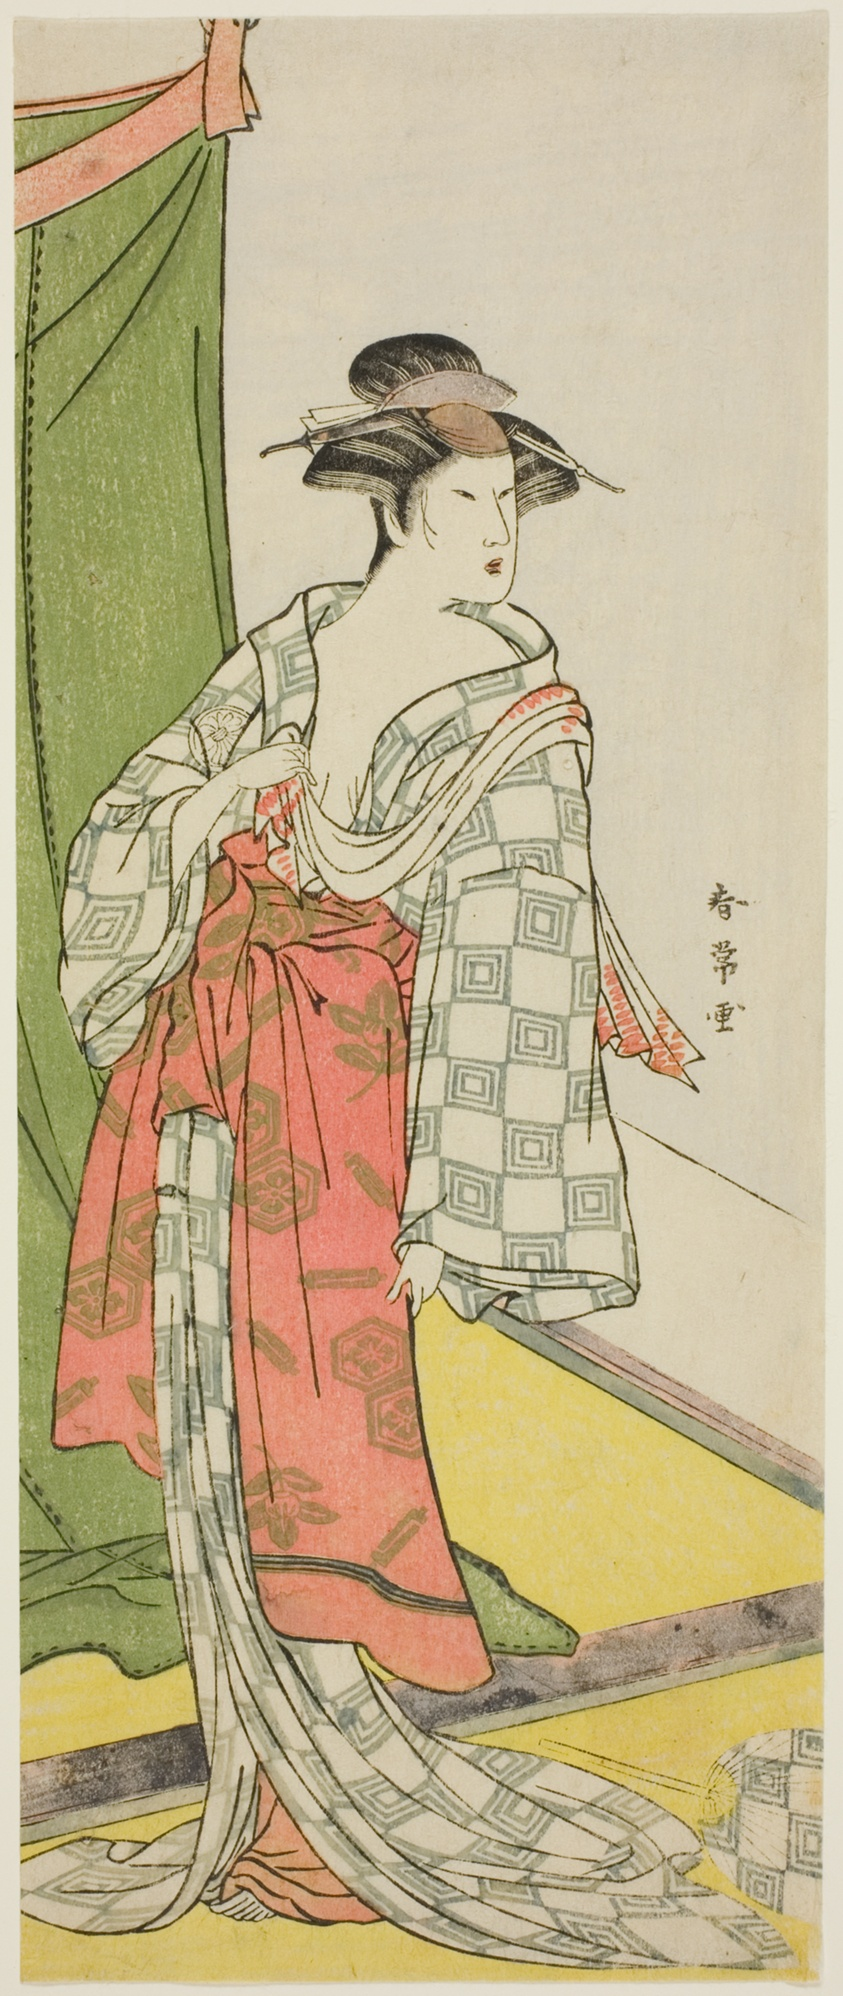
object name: Print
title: Actor Segawa Kikunojо̄ III as a Beauty in a Summer Kimono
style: Japanese (culture or style)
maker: Katsukawa Shunjô; Japanese, died 1787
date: Early 1780s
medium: Color woodblock print; hosoban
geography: Japan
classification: woodblock print; print; asian art